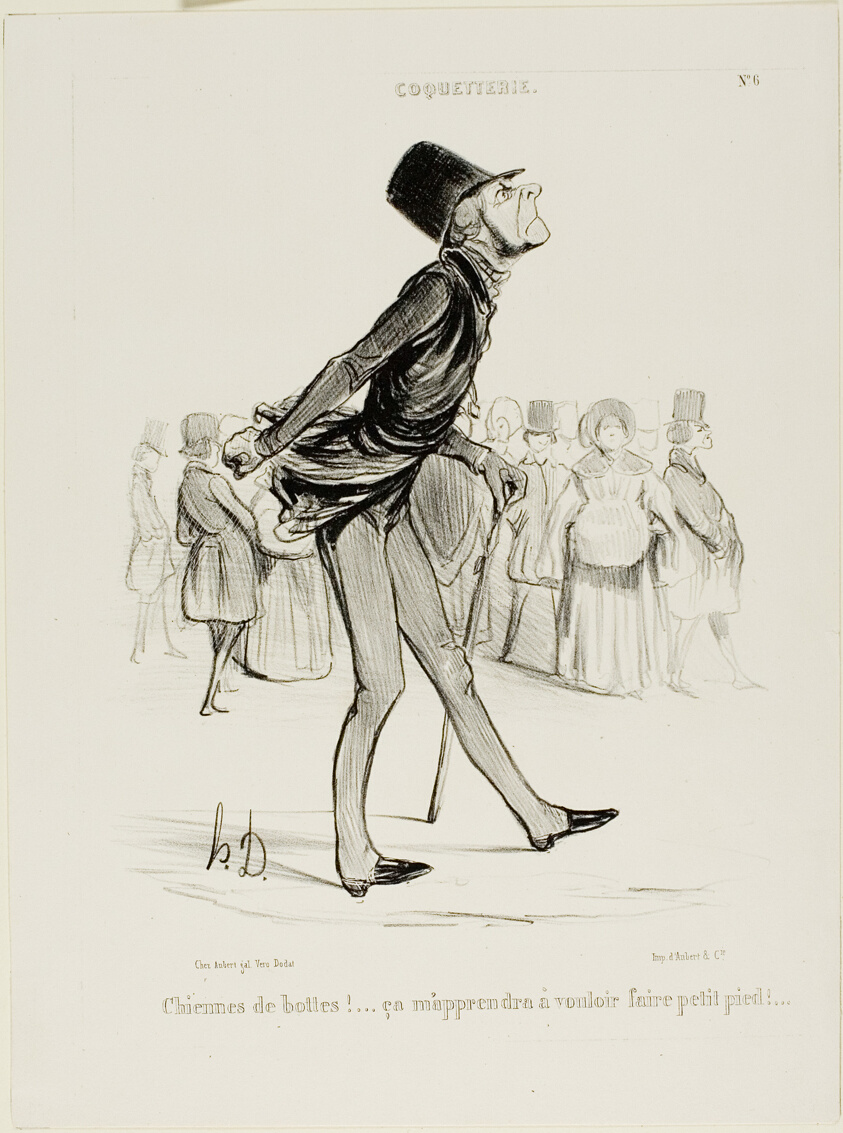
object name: Print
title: Damn Boots! That Will Teach Me to Take Smaller Steps...” plate 6 from Coquetterie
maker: Honoré Victorin Daumier; French, 1808-1879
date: 1839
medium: Lithograph in black on white wove paper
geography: France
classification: lithograph; print; prints and drawing